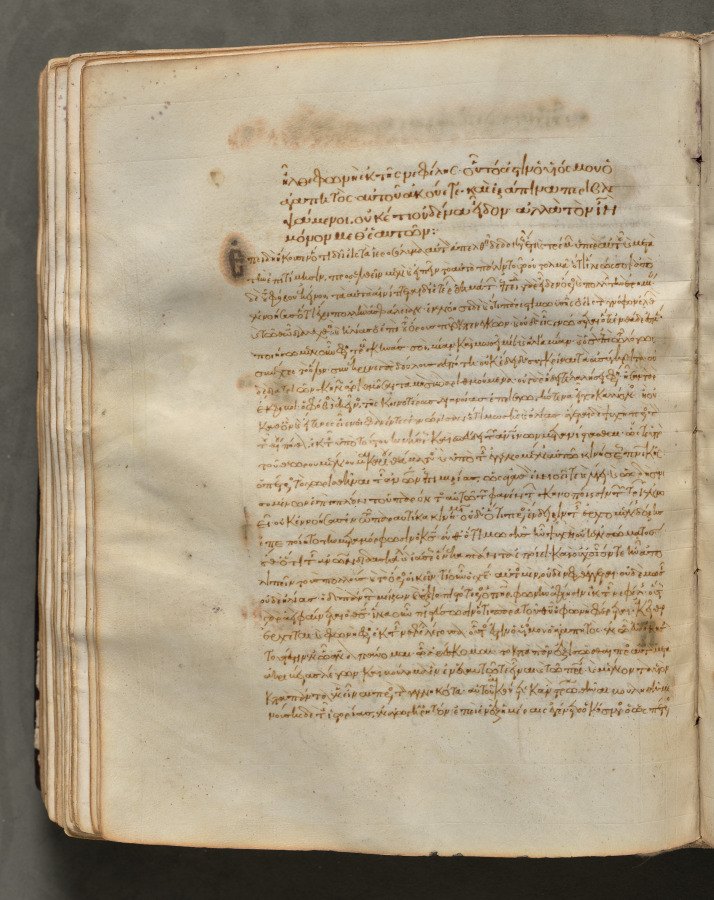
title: Text, folio 162 (verso), from a Gospel Book with Commentaries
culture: Byzantium, Constantinople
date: c. 1000–1100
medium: ink, tempera, and gold on vellum; leather binding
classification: Bound Volume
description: Each of the four gospels in this book opens on a page with brilliantly illuminated borders depicting the author of the text as well as birds-principally peacocks, symbols of the immortality of the soul-and fountains, representing the fountain of life and the salvation of the soul. This volume consists of 428 leaves with texts in Greek. Its level of sophistication suggests that it was probably written and decorated in a monastery in Constantinople.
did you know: Gospel Books were carried in procession through Byzantine churches.